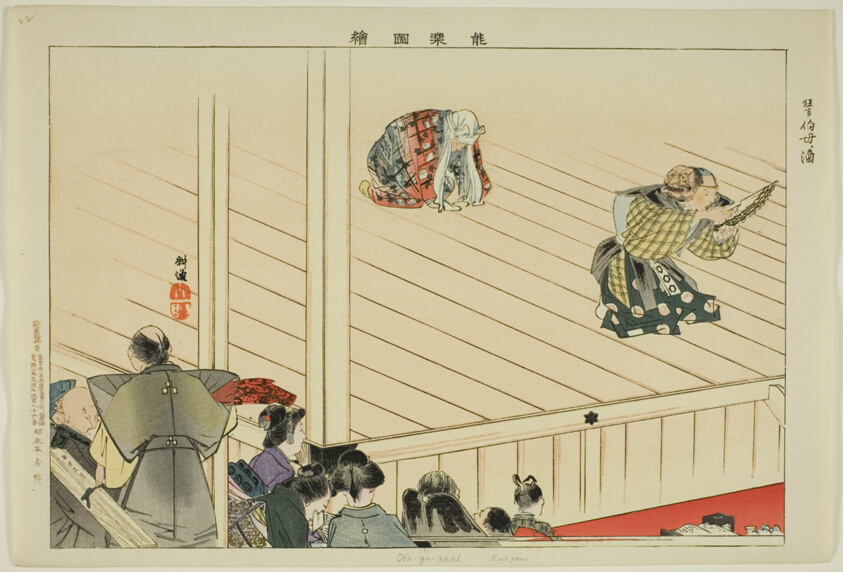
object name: Print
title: Oba-ga-zaki (Kyôgen), from the series "Pictures of No Performances (Nogaku Zue)"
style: Japanese (culture or style)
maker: Tsukioka Kogyo; Japanese, 1869-1927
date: 1898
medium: Color woodblock print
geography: Japan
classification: woodblock print; print; asian art